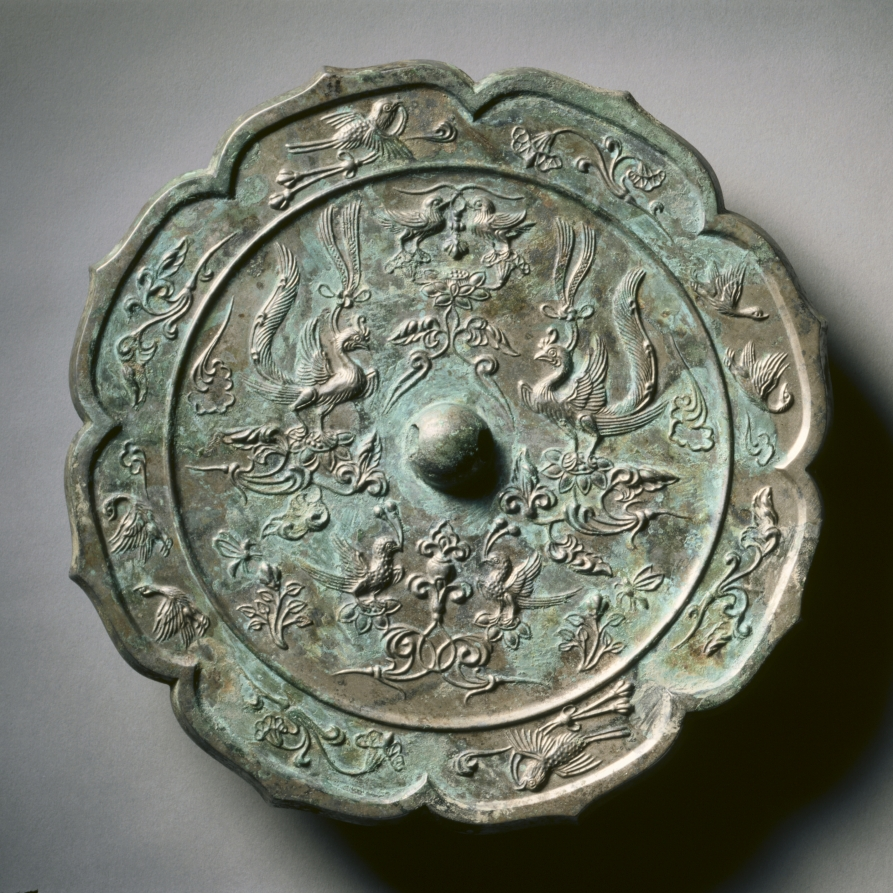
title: Octafoil Mirror with Paired Phoenixes, Birds, and Flowers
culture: China, Tang dynasty (618-907)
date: late 700s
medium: bronze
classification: Metalwork